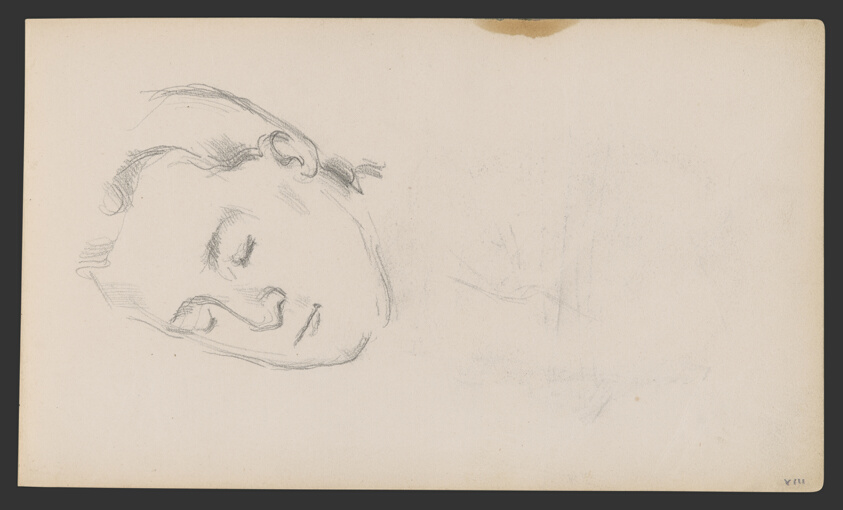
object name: Drawing and Watercolor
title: Sketchbook No. 2 (L'Estaque)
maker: Paul Cézanne; French, 1839-1906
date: 1875–86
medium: Graphite and pen and ink drawings on paper, bound into a book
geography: France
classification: sketchbook; graphite; prints and drawing; paper